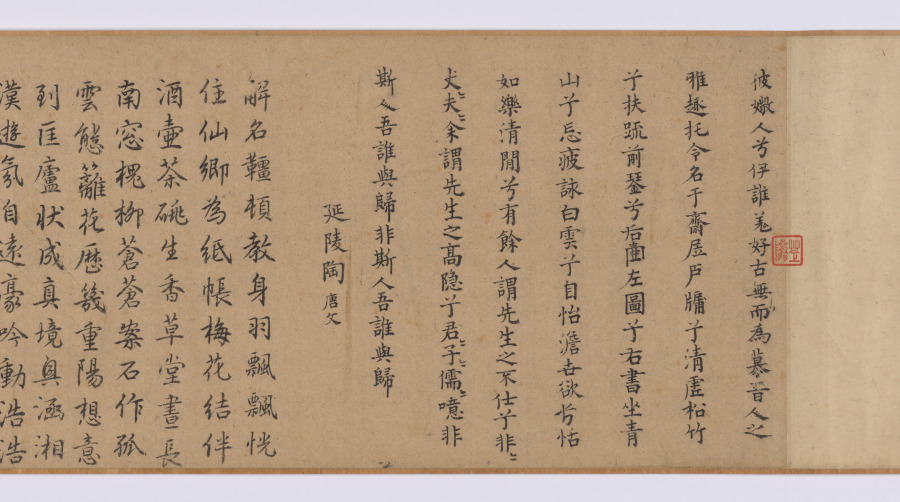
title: Leisure Enough to Spare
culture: China, Yuan dynasty (1271-1368)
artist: Yao Tingmei (Chinese, active mid-1300s)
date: 1360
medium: handscroll, ink on paper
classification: Painting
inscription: 至正廿年春正月_日作此併系鄙語于尾 地偏人遠閉柴關，滿院松陰白晝閒。 眼底風塵渾忘却，坐看流水臥看山。 吳興姚廷美畫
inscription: 23 colophons and 53 seals (dates unavailable for some): 1 colophon, dated 1360, and 2 seals of Yang Weizhen (1296-1370); 1 colophon and 3 seals of Wan Yi; 1 colophon of Zhang Junde; 1 colophon and 3 seals of Angji (act. ca. mid-14th c.); 1 colophon and 1 seal of Xu Shiquan; 1 colophon and 3 seals of Gao Yu; 1 colophon and 2 seals of Li Mingfu; 1 colophon and 2 seals of Lu Lin; 1 colophon and 1 seal of Zhang Qian; 1 colophon of Tao Tangwen; 1 colophon and 1 seal of Wu Yuangui (act. ca. 1300-60); 1 colophon of Bao Jiong; 1 colophon of Wang Zao; 1 colophon and 1 seal of Ma Chuyi; 1 colophon and 1 seal of Lin Yizhuang; 1 colophon and 1 seal of Gu Shunju; 1 colophon and 2 seals of Wang Jing; 1 colophon and 2 seals of Lin Shouchang; 1 colophon and 1 seal of Gao Zhidao; 1 colophon of Lin Xun; 1 colophon, dated 1359, and 2 seals of Meng Weicheng (act. mid-14th c.); 1 colophon and 1 seal of Meng Zhiji (act. mid-l4th c.); 14 seals of Liang Qingbiao 梁清標 (1620-1691); 1 poem dated 1755 and 5 seals of the Qianlong 乾隆 emperor (r. 1736-95); 2 seals of the Jiaqing 嘉慶 emperor (r. 1796-1821); 3 seals of the Xuantong 宣統 emperor (r. 1909-11).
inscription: Title on frontispiece by Zhang Bi 章弼: Signed Gongchen 拱辰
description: Seclusion and leisure—the ideals of the literati, or scholar-gentlemen—are expressed in this mature work by Yao Tingmei. The theme acquired special meaning at a time of the military uprisings near the end of the Yuan dynasty. Dedicated to an ascetic named Du, this work combines painting, calligraphy, and poetry; following the painting are more than 20 poems and essays written by notable scholars, one of whom was the calligrapher Yang Weizhen. It reveals not only the aesthetic taste of the literati but also the practice of contributing artistic and literary works to fulfill social obligations. Yao's painting demonstrates his individual style derived from various ancient masters (Guo Xi, Dong Yuan, and Juran). Yang Weizhen's calligraphy exhibits his bold, vigorous style and his intent to capture the spirit of antiquity in art.